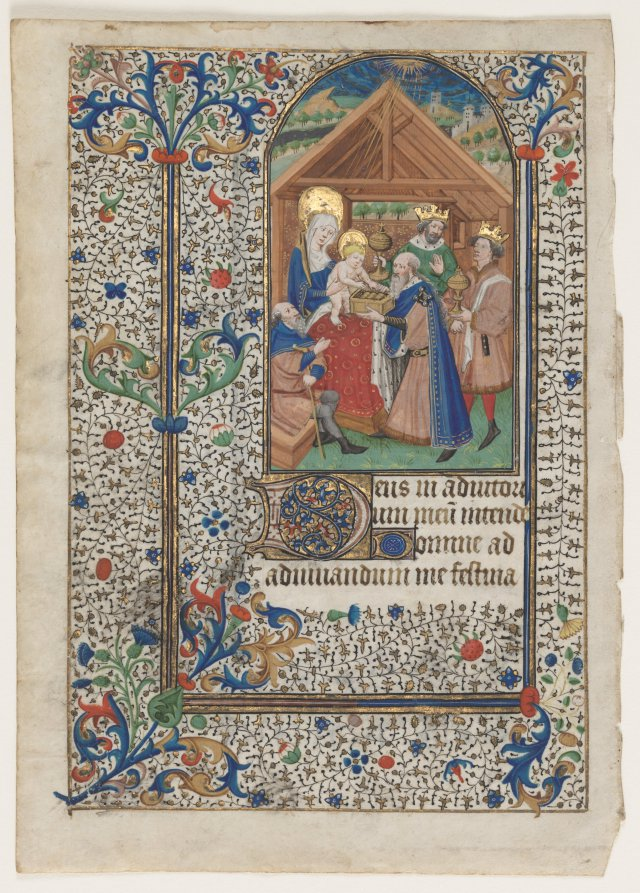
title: Leaf from a Book of Hours: Adoration of the Magi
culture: France, Paris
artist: Master of Thomas Hoo (French)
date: c. 1440–50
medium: ink, tempera and gold on vellum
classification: Manuscript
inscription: Deus in adiutorium meum intende...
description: The Adoration of the Magi, an important image in Christian tradition that recalls the visit of three kings to see the newly born Jesus, is depicted here. The artist, known as the Master of Thomas Hoo, gets his name from a book of hours made for Lord Thomas Hoo, chancellor of Normandy and of France. His work is characterized by a rich palette, lush draperies, and finely delineated landscapes. The artist thickly applied gold leaf to the crowns and halos and used liquid gold to highlight the hems of his figures’ garments.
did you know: This page begins the prayers to be said at the hour of sext, or the sixth hour of the day (around noon).